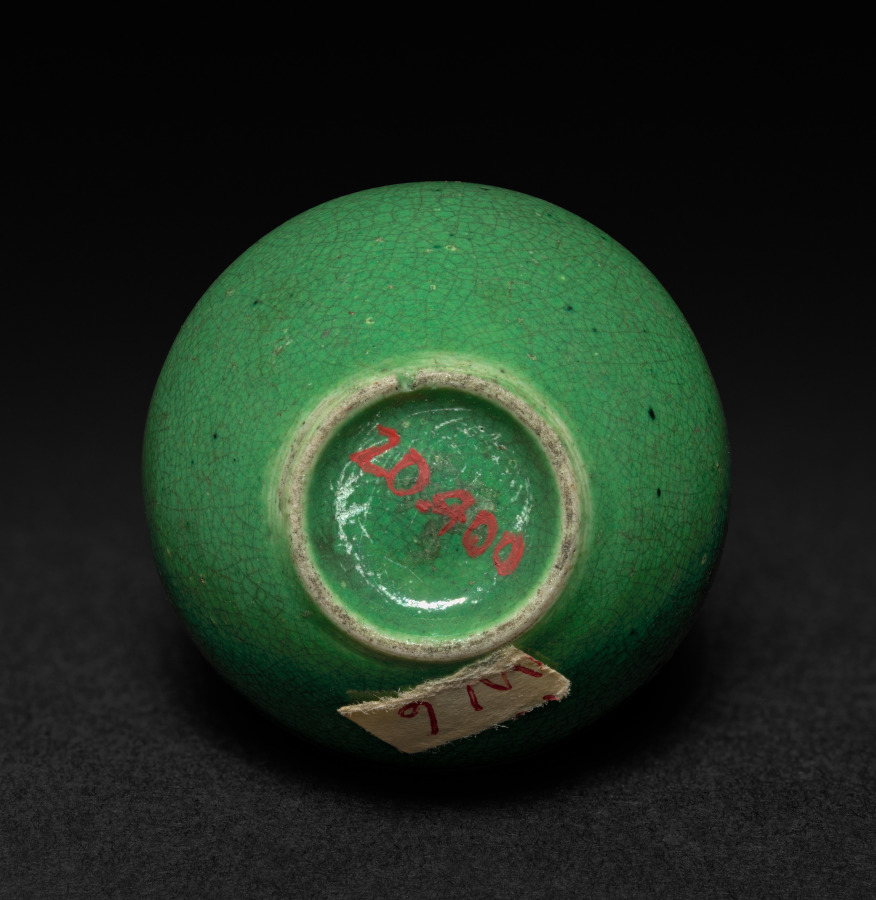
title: Vase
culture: China, Qing dynasty (1644-1911)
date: 1644–1911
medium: porcelain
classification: Ceramic